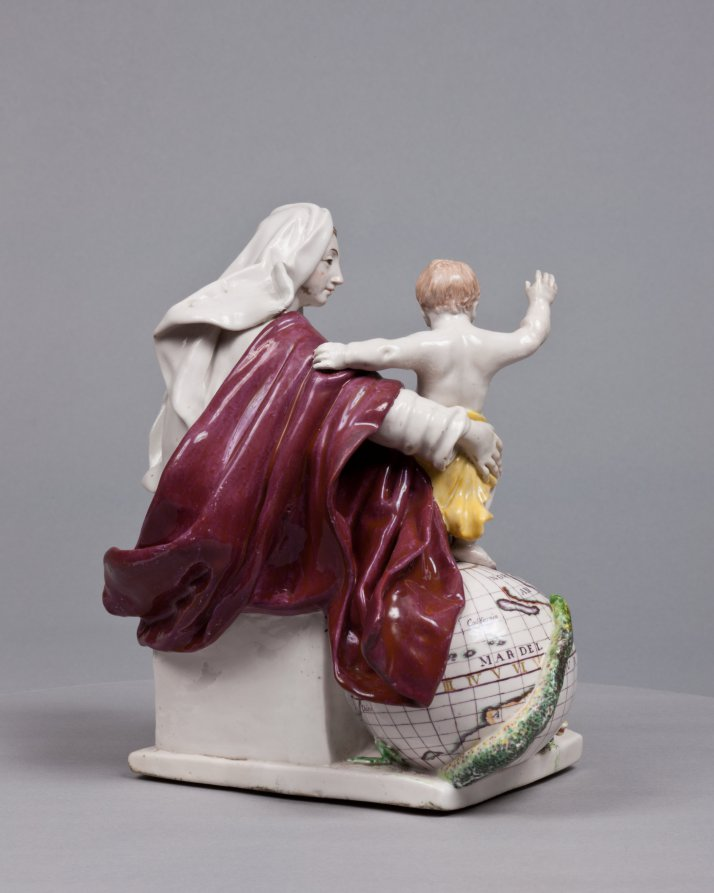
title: Madonna and Child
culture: England, Chelsea, 18th century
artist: Chelsea Porcelain Factory (Britain, London, 1745–84)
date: c. 1755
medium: porcelain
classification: Ceramic